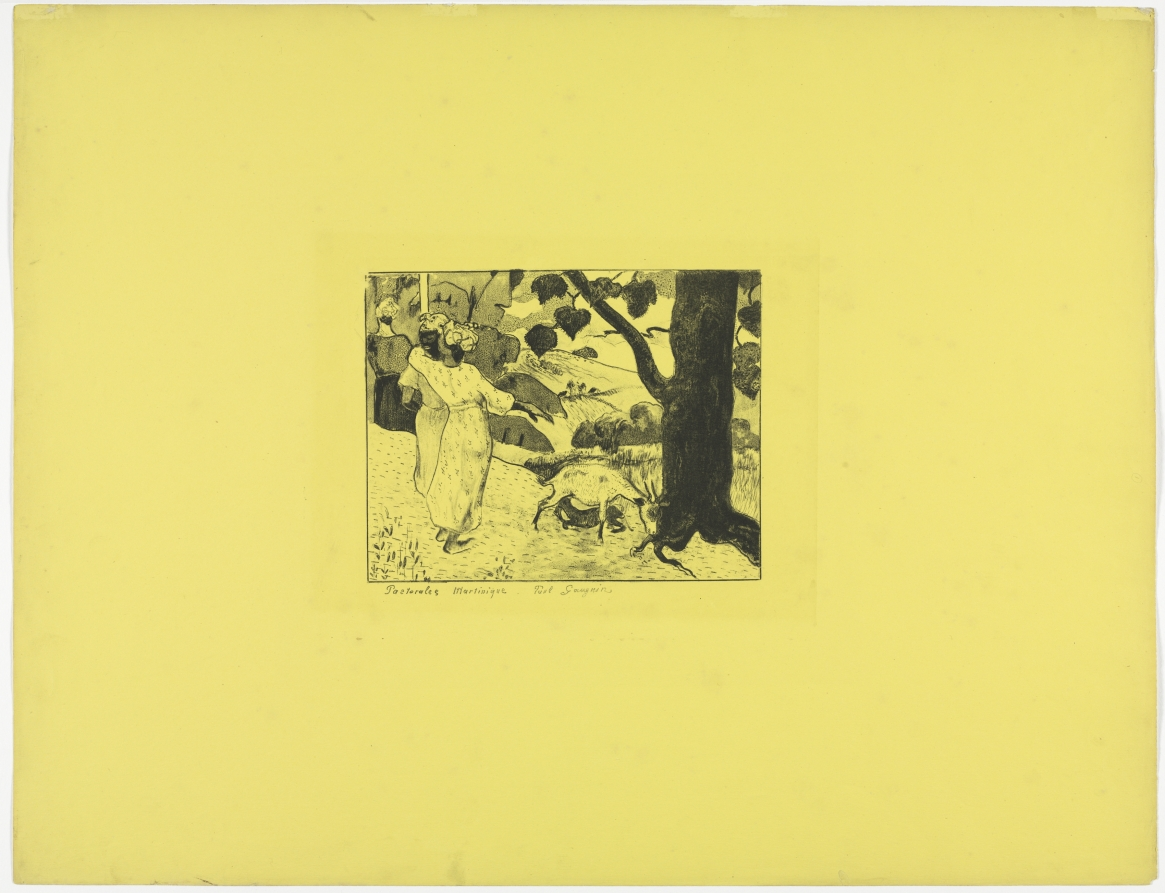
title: Volpini Suite: Martinique Pastoral (Pastorales Martinique)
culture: France, 19th century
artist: Paul Gauguin (French, 1848–1903)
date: 1889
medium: zincograph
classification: Print